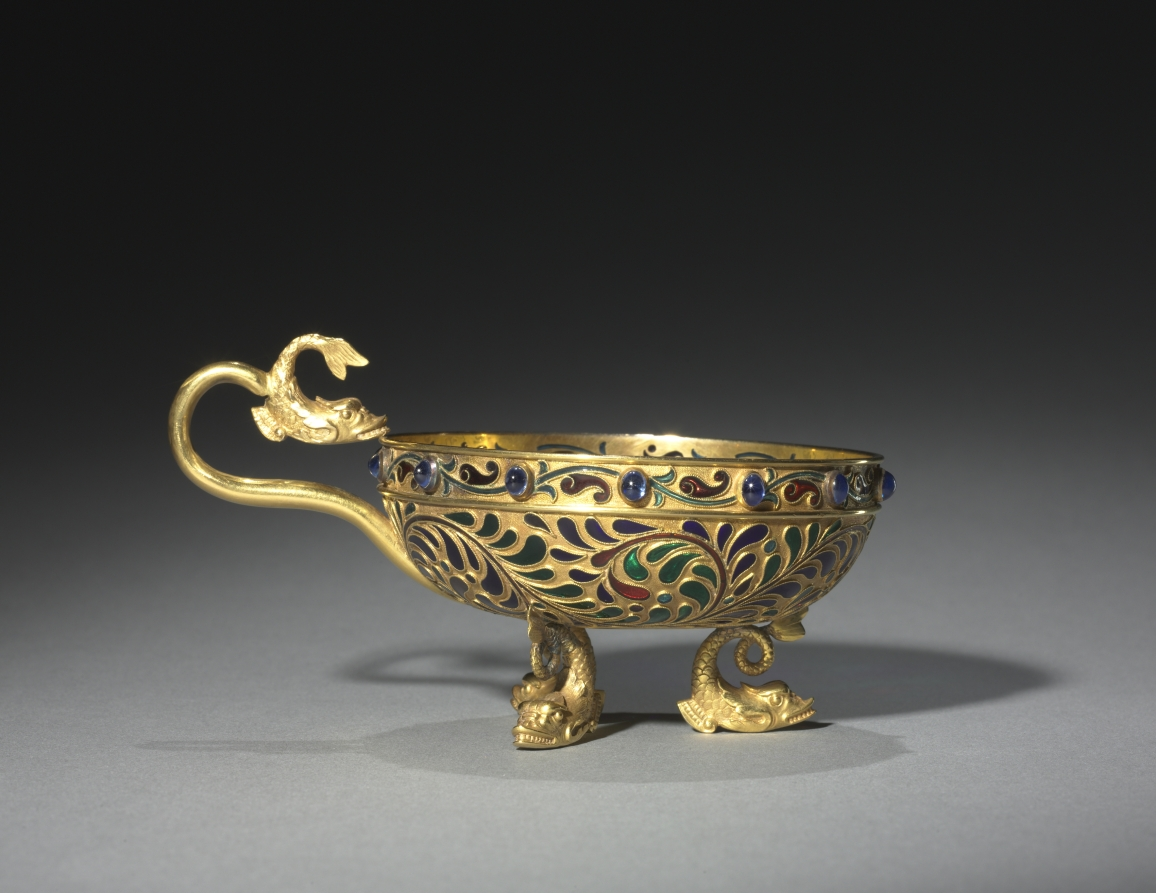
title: Charka (Drinking Vessel)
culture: Russia, Moscow(?), late 19th-early 20th Century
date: late 1800s-early 1900s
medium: gold, plique-a-jour enamels, gold coin, sapphires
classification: Miscellaneous